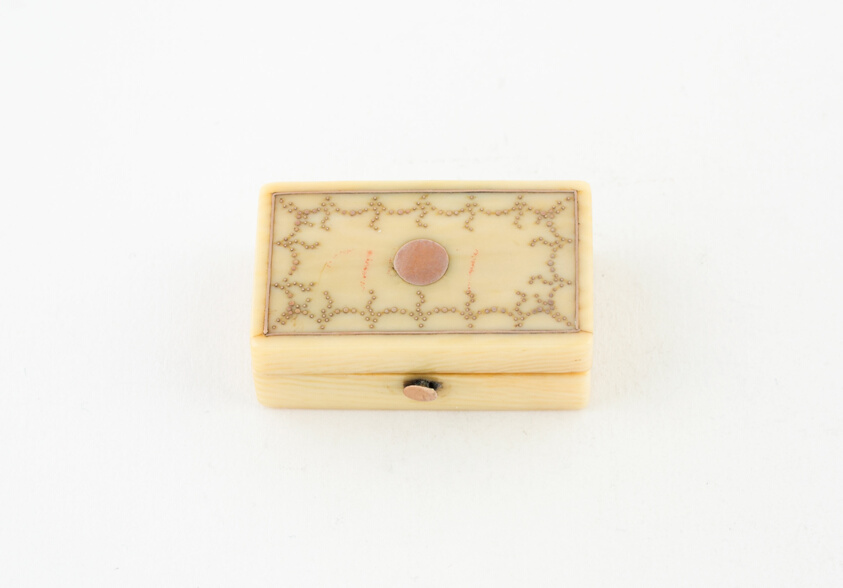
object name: Metalwork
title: Vinaigrette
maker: Possibly England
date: c. 1780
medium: Bone and silver gilt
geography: England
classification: vinaigrette (container for health care); container for personal use; box; european decorative arts; metalwork; silver; decorative object/ornament